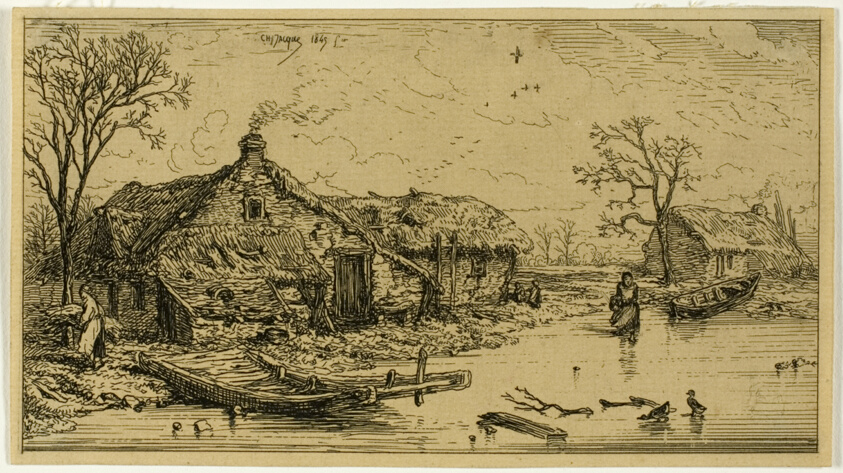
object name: Print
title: The Frozen Pond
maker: Charles Émile Jacque (French, 1813-1894)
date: 1845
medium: Etching on cream laid paper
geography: France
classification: etching; print; prints and drawing